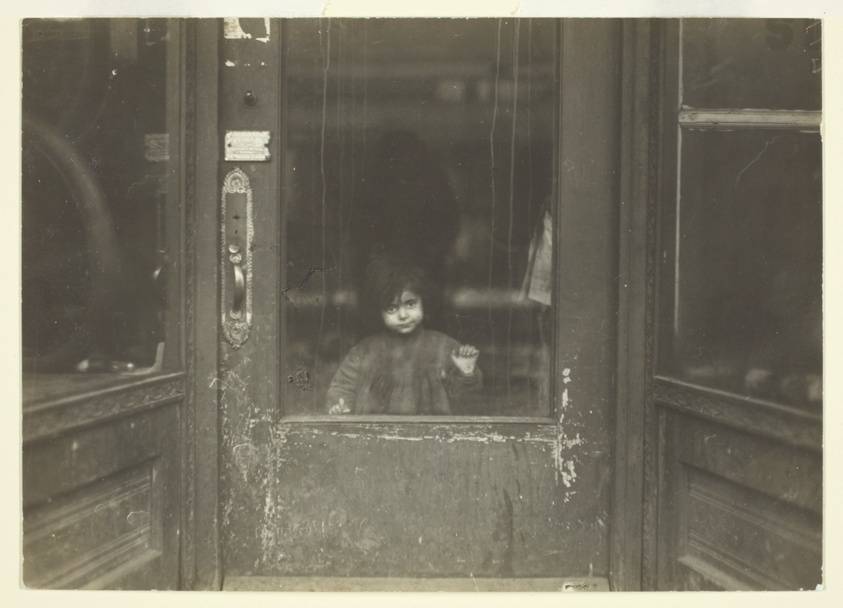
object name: Photograph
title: Chicago Slums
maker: Lewis Wickes Hine (American, 1874–1940)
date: 1910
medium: Gelatin silver print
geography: United States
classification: gelatin silver (developing-out-paper) pr; photographic process; photography; photograph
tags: Collected by Hugh Edwards, Chicago, documentary